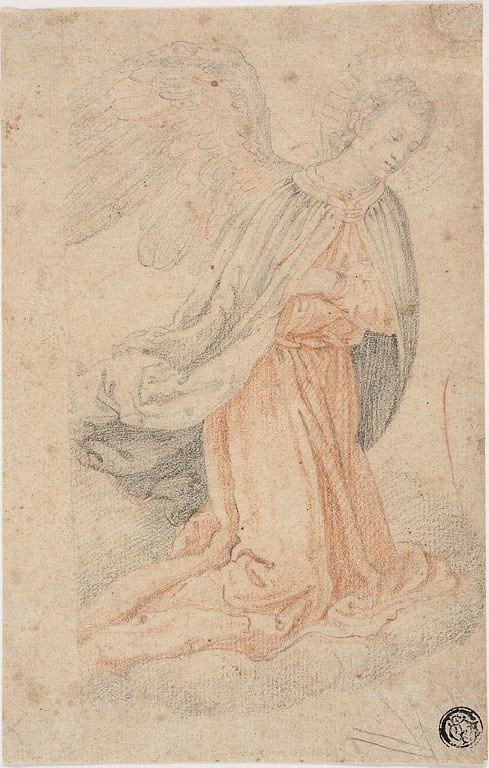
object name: Drawing and Watercolor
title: Kneeling Angel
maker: Attributed to Federico Zuccaro; Italian, 1540/41-1609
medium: Red and black chalk on tan laid paper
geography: Italy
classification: chalk; drawings (visual works); prints and drawing